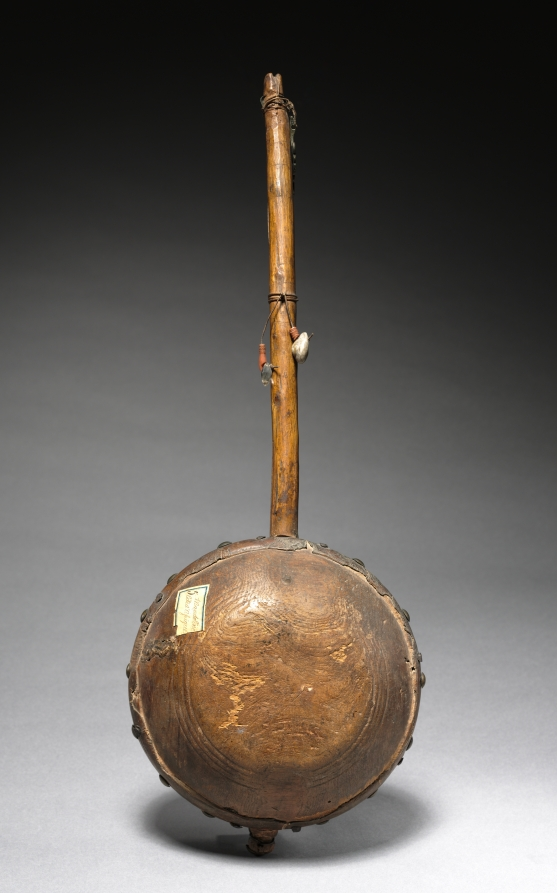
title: Mandoline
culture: Africa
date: 1900s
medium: Wood, rawhide, upholstery studs, string, metal, and colorant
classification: Musical Instrument